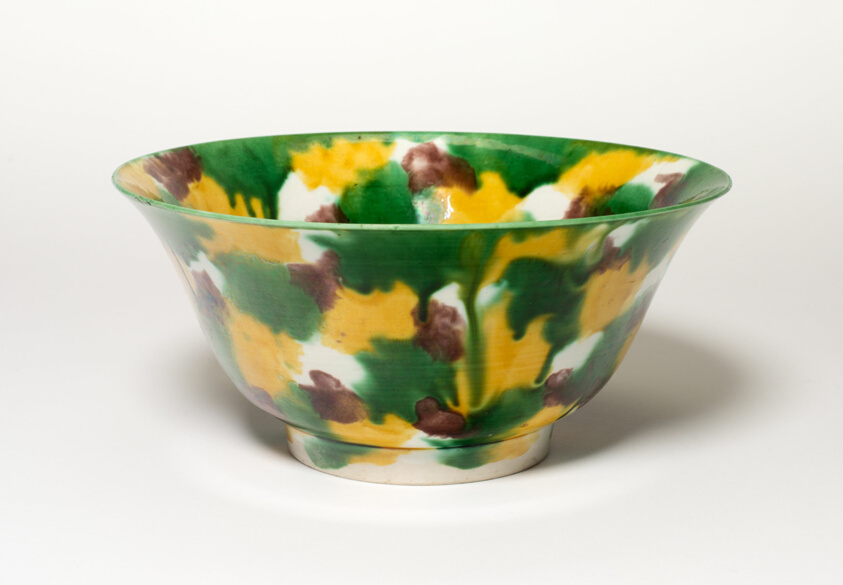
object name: Vessel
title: Bowl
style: Chinese (culture or style)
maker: China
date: Qing dynasty (1644–1911), Kangxi period (1662–1722), early 18th century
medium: Porcelain painted in overglaze "egg-and-spinach" enamels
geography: China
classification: bowl; porcelain; dish (vessel); ceramics; asian art; vessel